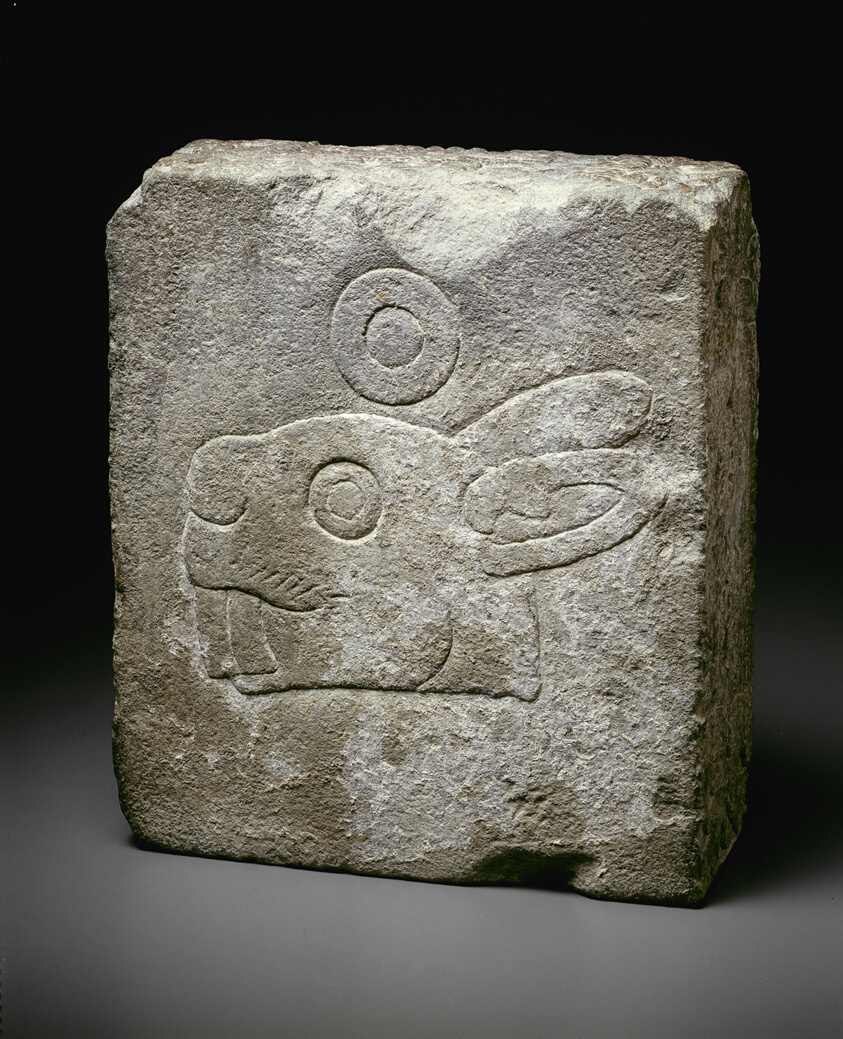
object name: Sculpture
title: Coronation Stone of Motecuhzoma II (Stone of the Five Suns)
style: aztec, mesoamerican, Pre-Columbian, americas, Arts of the Americas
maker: Aztec (Mexica) (Tenochtitlan, Mexico)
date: 1503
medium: Basalt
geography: Tenochtitlan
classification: ceremonial object; stone; art of the americas; sculpture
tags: architecture, history, coronations, animals, record of events, Hieroglyphs, Mexico, Aztecs, mythology, kingship, rulers (people), goddesses